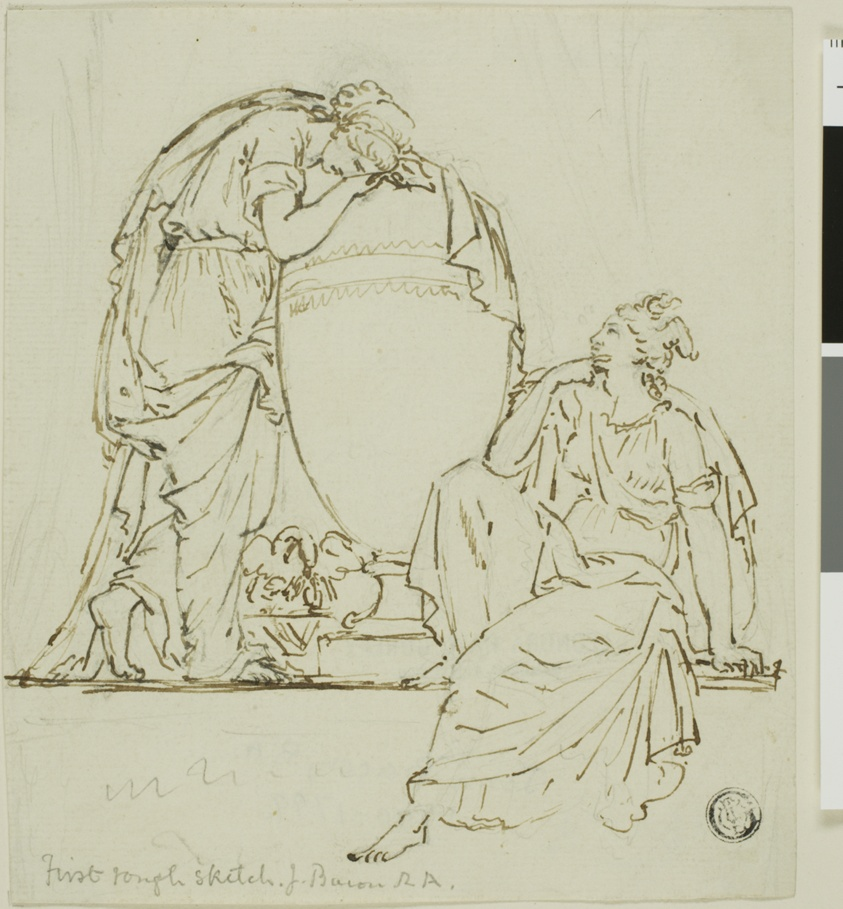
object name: Drawing and Watercolor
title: Sketch for a Funeral Monument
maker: John Bacon, the elder (English, 1740-1799)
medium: Pen and brown ink, over graphite, on ivory laid paper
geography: England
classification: pen and ink drawings; drawings (visual works); prints and drawing